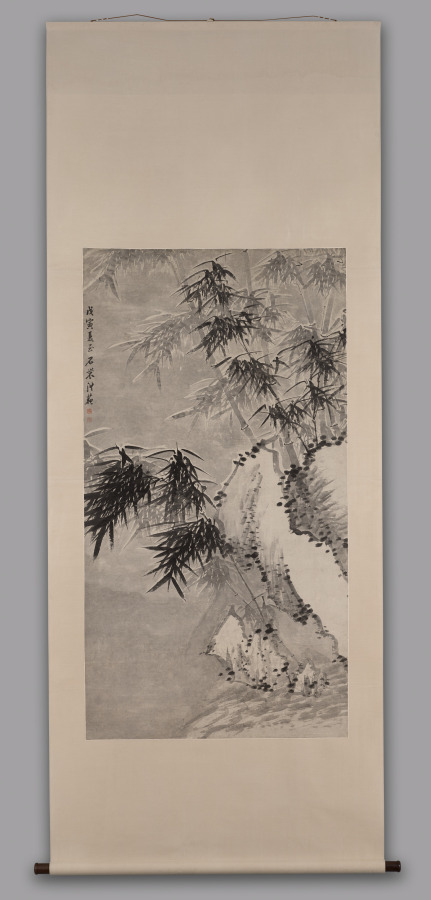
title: Bamboo in Snow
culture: China, Qing dynasty (1644–1911)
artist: Hong Fan (Chinese, active late 1700s–early 1800s)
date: 1818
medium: hanging scroll; ink on paper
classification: Painting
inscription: 戊寅夏至石農洪範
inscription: 洪範之印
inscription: 石農詩畫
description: Hong Fan’s bamboo stalks amidst rocky boulders bend gently forward. Light washes of ink suggest a misty, wintry atmosphere. Fan was inspired in style and concept by the poet, calligrapher and painter, Su Shi (1037-1101) who considered bamboo an ideal subject to express the calligraphic qualities of brushwork. Bamboo that bends, but does not break under the heavy snow, was also an image for the upright scholar who withstands adverse times.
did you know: Hong Fan’s bamboo stalks and rocky boulders fill the picture plane almost entirely and recede and fade in the background, suggesting the depth of a grove and a wintry, hazy atmosphere.